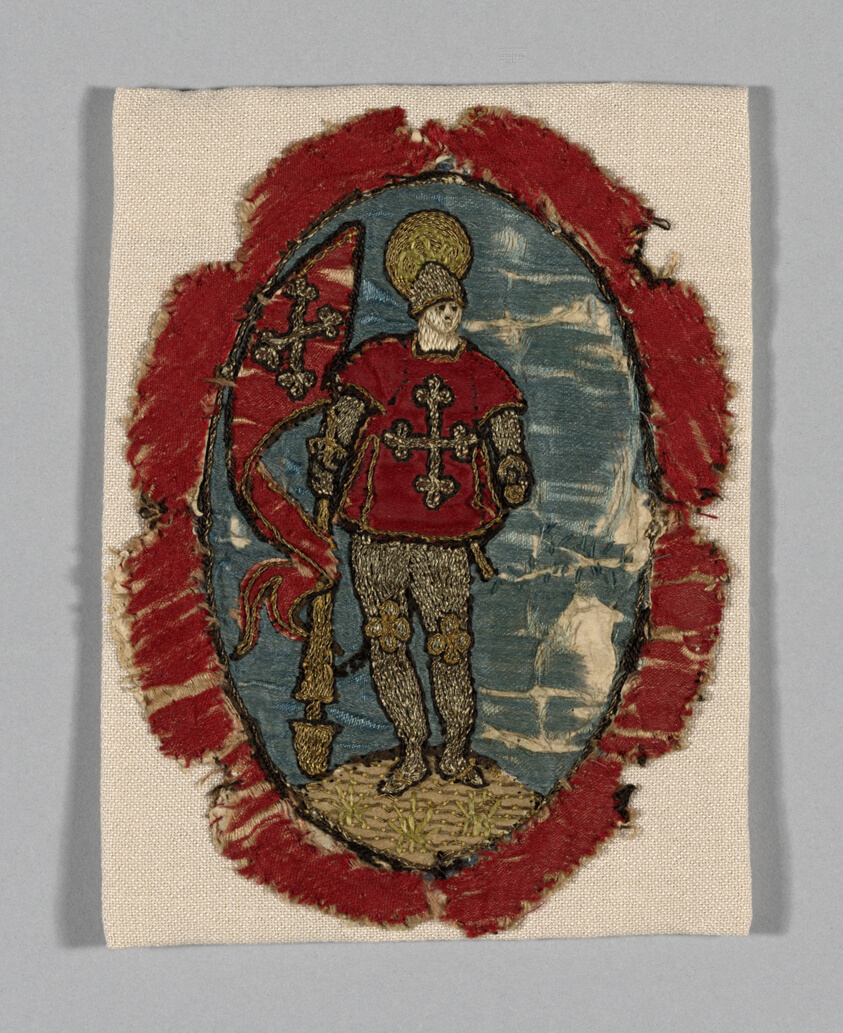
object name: Textile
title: Medallion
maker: Italy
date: 17th century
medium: Silk, satin weave over paper; embroidered in silk floss, metal thread (strip wrapped on silk core); appliqued in silk, satin weave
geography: Italy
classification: textile; needlework (visual works)